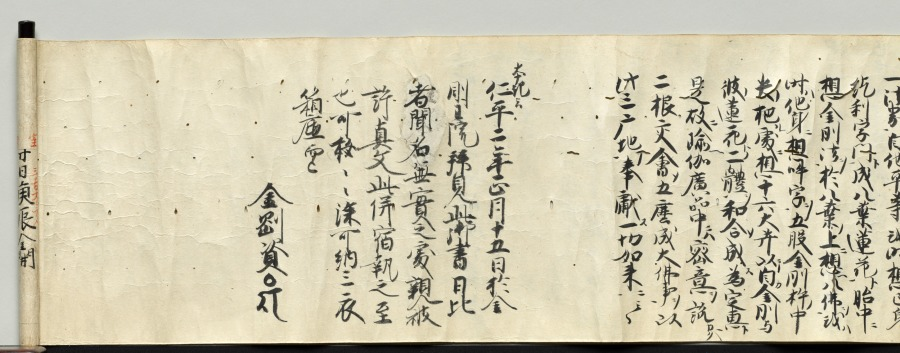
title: Scroll of Miscellaneous Notes written on a Calendar by Priest Seigen (recto)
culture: Japan, Kamakura period (1185–1333)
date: c. 1200–1231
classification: Manuscript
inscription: bears miscellaneous notes written by Priest Seigen.